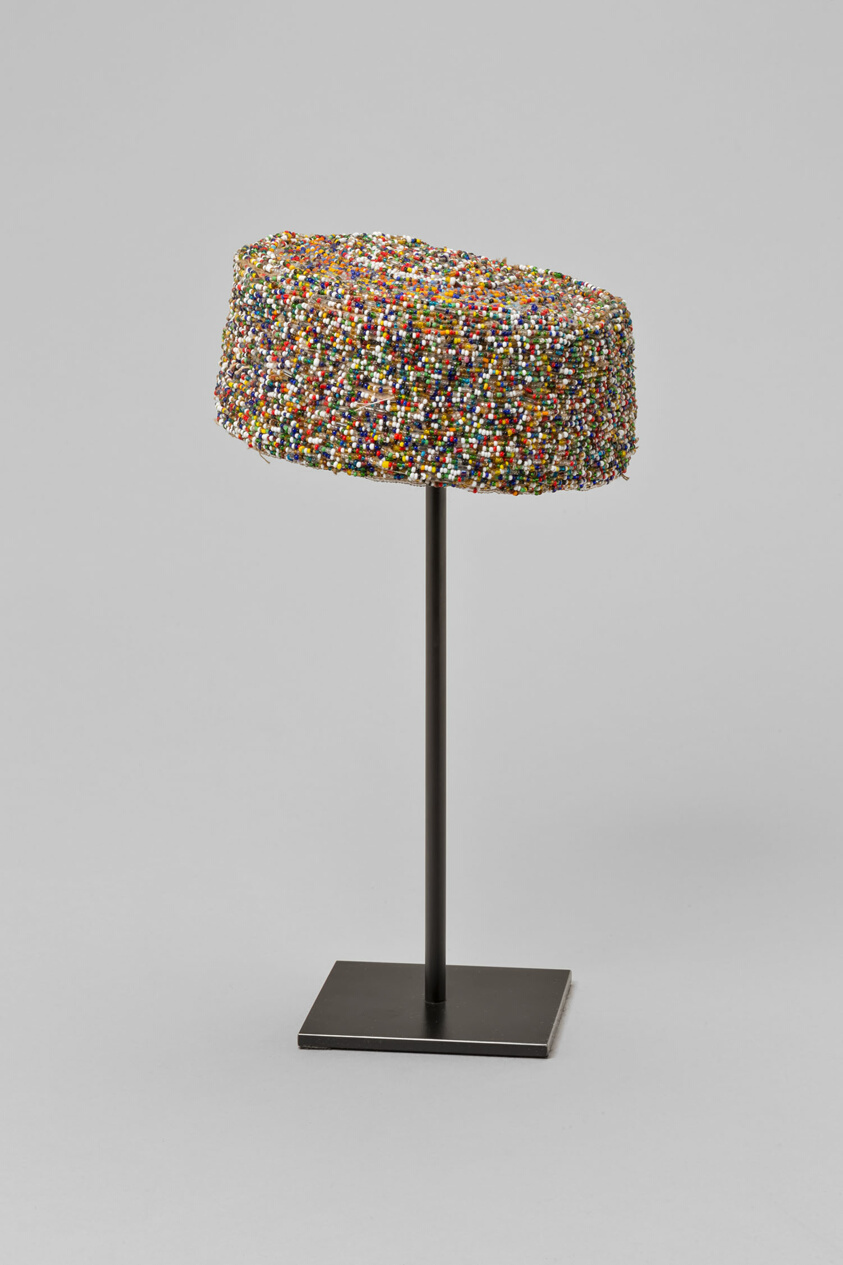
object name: Costume and Accessories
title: Royal Cap (Orikogbofo)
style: yoruba, Arts of Africa, african Art, Coastal West Africa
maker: Yoruba; Nigeria; Coastal West Africa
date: Early/mid–20th century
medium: Glass, cloth, and string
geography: Nigeria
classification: hat; string; glass; cloth; arts of Africa; african art; costume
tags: royalty